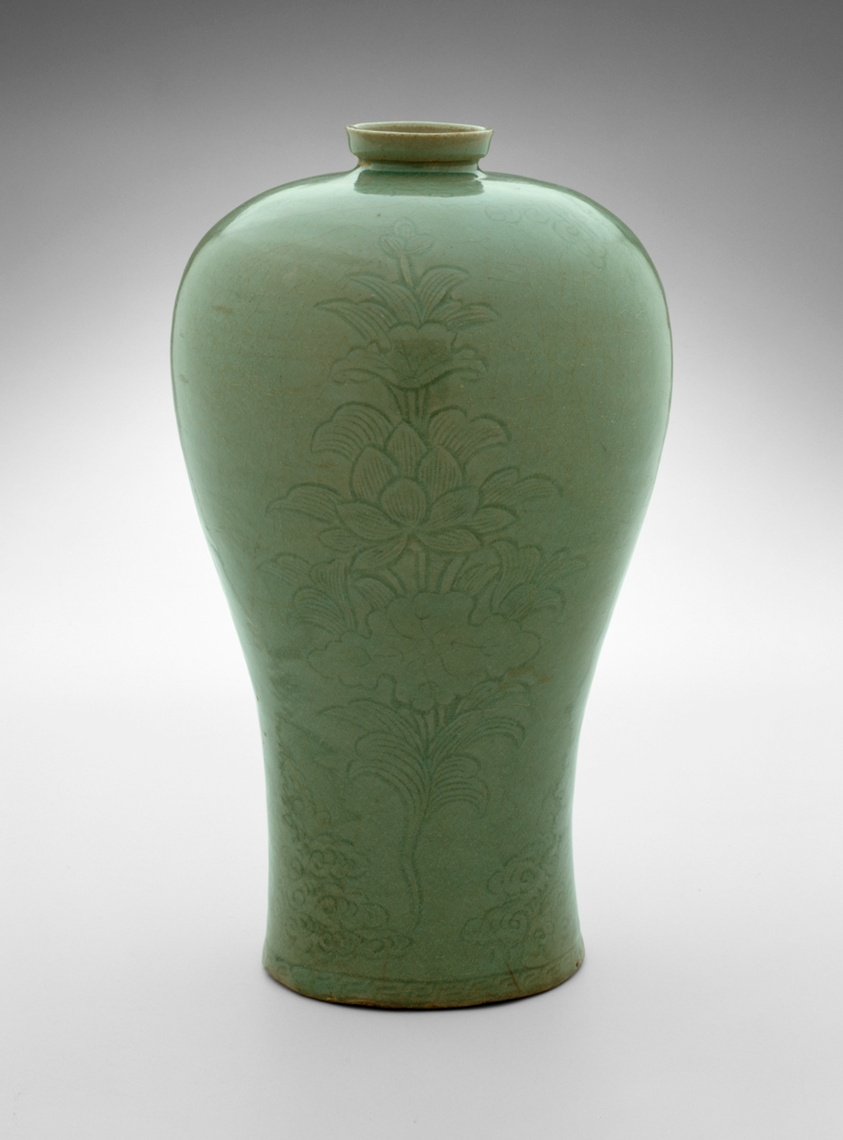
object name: Decorative Arts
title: Plum Vase (Maebyeong) with Lotus Motif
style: Korean (culture or style)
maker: Korea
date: Goryeo dynasty (918–1392), 12th century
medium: Stoneware with celadon glaze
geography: Korea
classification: vase; vessel; stoneware; asian art; ceramics; decorative arts